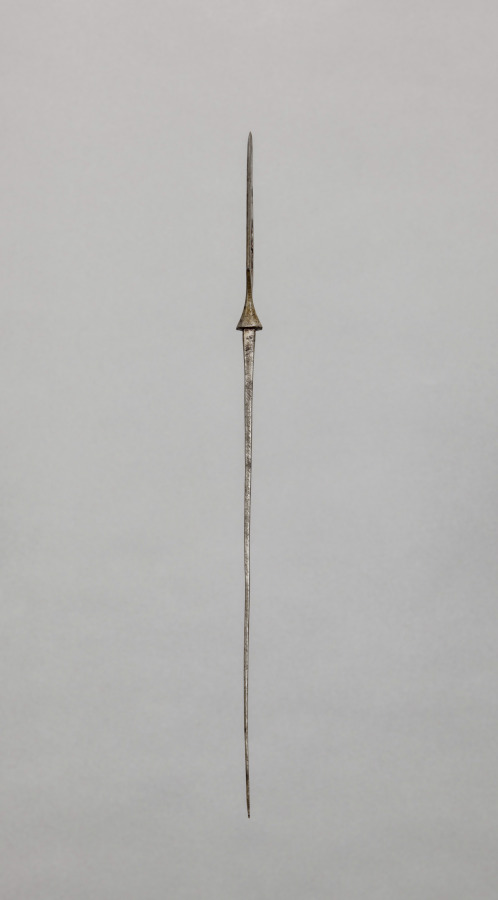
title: Arrow Point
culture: Japan, Edo period (1615–1868)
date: 1700s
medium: steel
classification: Arms and Armor